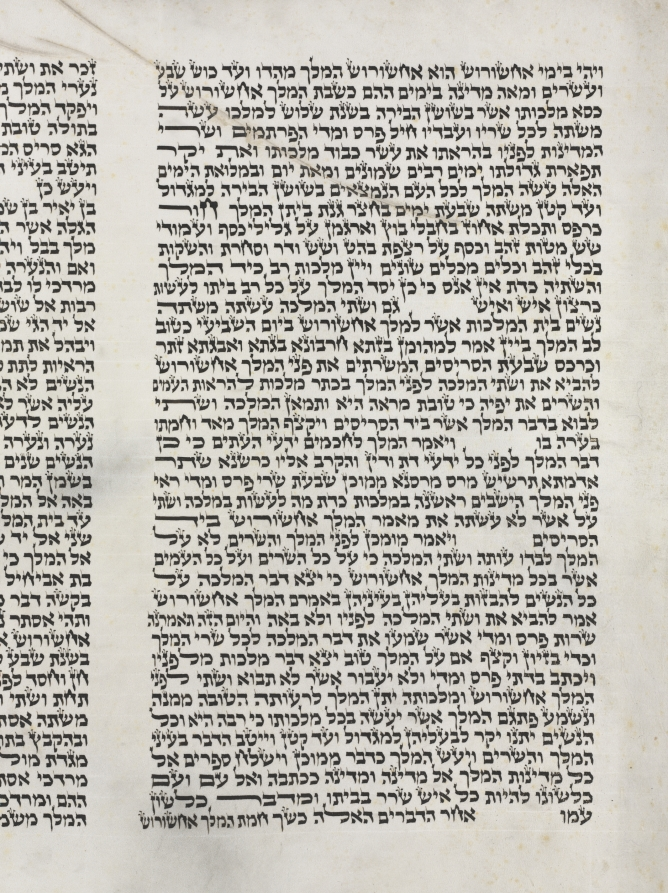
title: Scroll of Esther for the Purim Festival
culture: Europe (Eastern?), Hebrew, 19th century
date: c. 1850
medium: ink on vellum (eight columns, 39 lines of text on three membranes)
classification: Manuscript